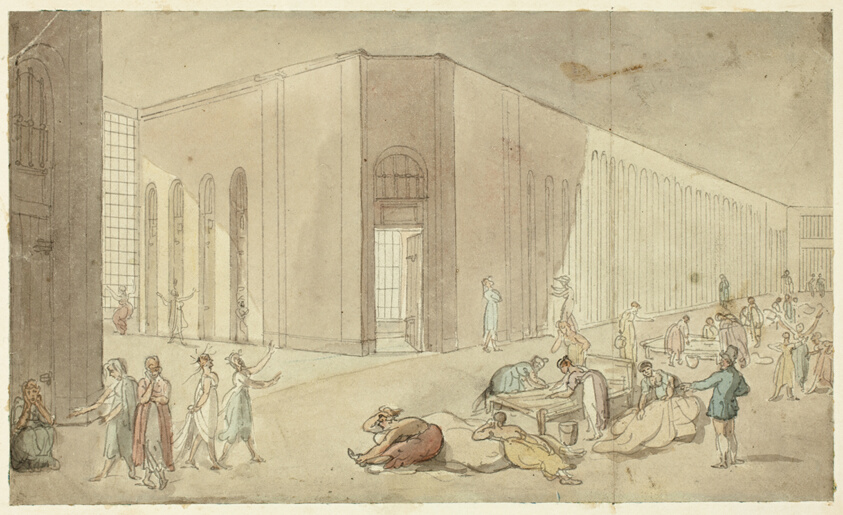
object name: Drawing and Watercolor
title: Study for St. Luke's Hospital, from Microcosm of London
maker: Augustus Charles Pugin (English, born France, 1762-1832); Thomas Rowlandson (English, 1756-1827)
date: c. 1809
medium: Pen and brown ink with brush and brown wash and watercolor, on ivory wove paper, pieced and laid down on cream wove paper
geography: England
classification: pen and ink drawings; watercolor; drawings (visual works); prints and drawing